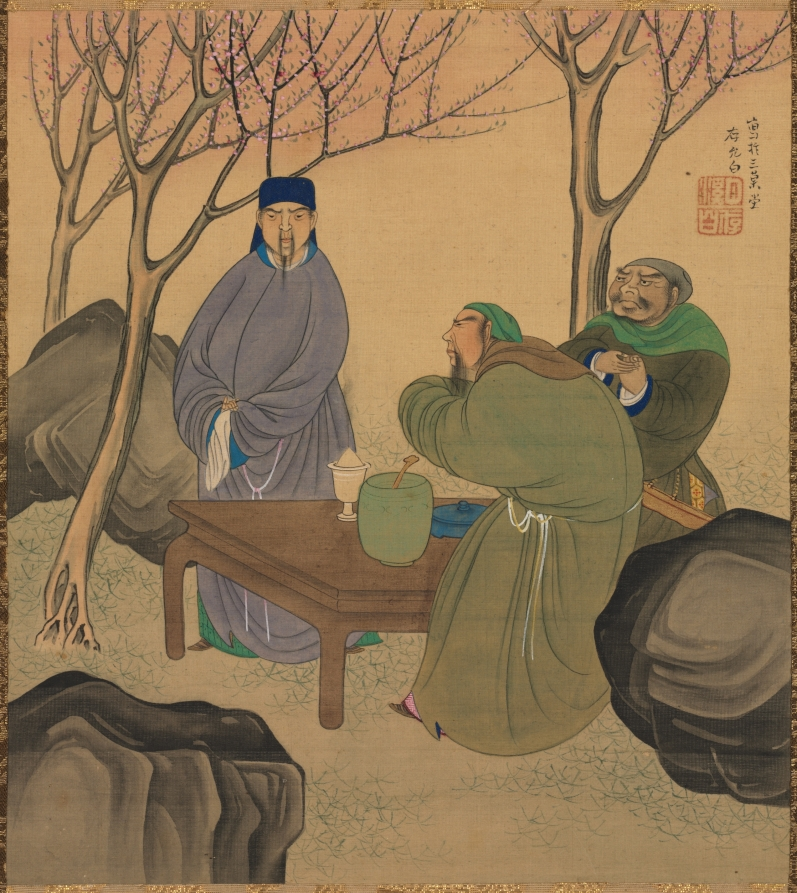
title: Oath of the Peach Garden, from Romance of the Three Kingdoms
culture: Japan, Edo period (1615–1868)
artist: Matsumura Goshun (Japanese, 1752–1811)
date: c. 1780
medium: hanging scroll; ink and color on silk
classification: Painting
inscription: Artist's signature and seal at upper right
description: This painting depicts a pivotal scene from the classic Chinese historical novel Romance of the Three Kingdoms. Three men, Liu Bei, seen to the left, and Guan Yu and Zhang Fei, seen to the right, become sworn brothers amid peach blossom trees. Set toward the end of China’s Eastern Han dynasty (25–220 CE), the episode features the tagline “We seek not to be born on the same day but hope that we may die on the same day.” Written in the 1300s, the first published translation in Japanese appeared around 1690, after which it exploded in popularity.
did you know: Matsumura Goshun was trained in literati art by Yosa Buson and Maruyama Ōkyo.